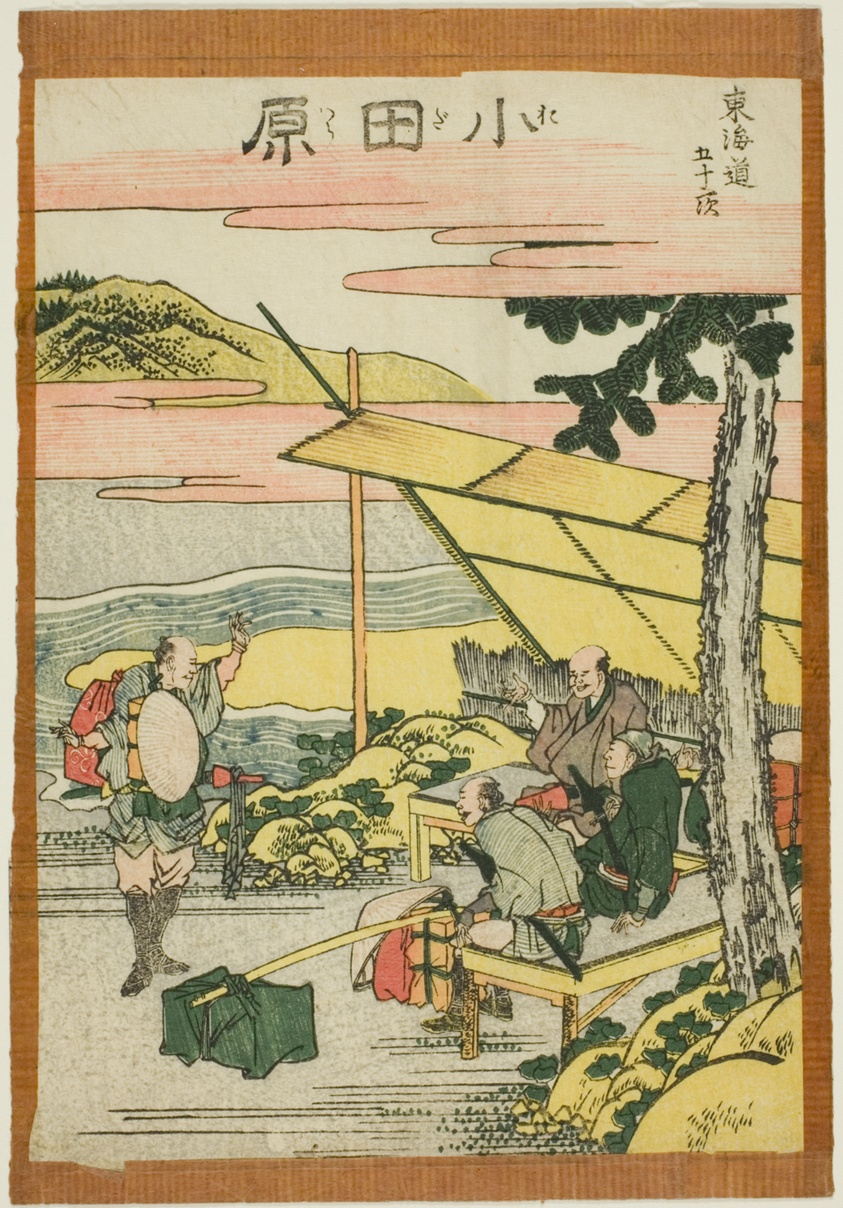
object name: Print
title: Odawara, from the series "Fifty-three Stations of the Tokaido (Tokaido gojusan tsugi)"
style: Japanese (culture or style)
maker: Katsushika Hokusai 葛飾 北斎; Japanese, 1760-1849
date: c. 1806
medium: Color woodblock print; chuban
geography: Japan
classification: woodblock print; print; asian art